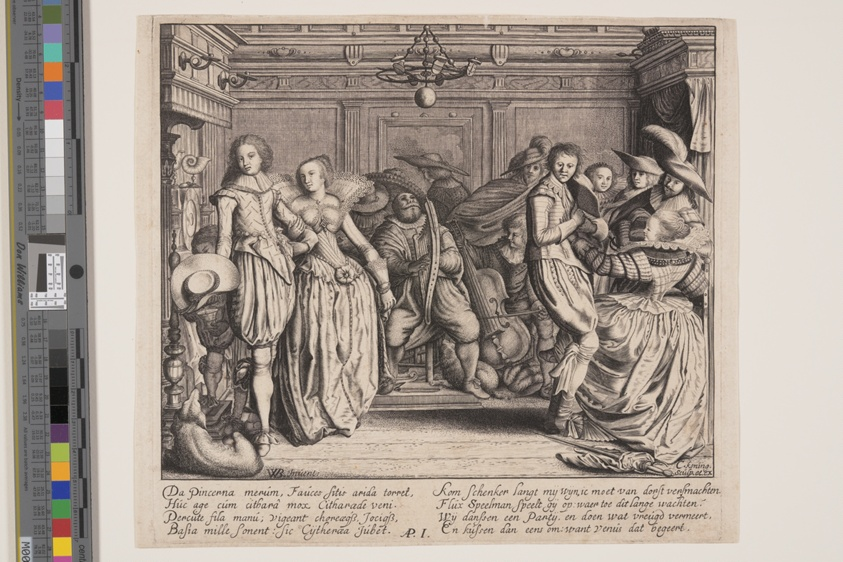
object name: Print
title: Interior with Musicians and Dancing Couples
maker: Cornelis Koning (Dutch, c. 1610–1671); after Willem Pietersz. Buytewech (Dutch, c. 1591-1624)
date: c. 1620-25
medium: Engraving on ivory laid paper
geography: Netherlands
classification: engraving; paper; print; prints and drawing